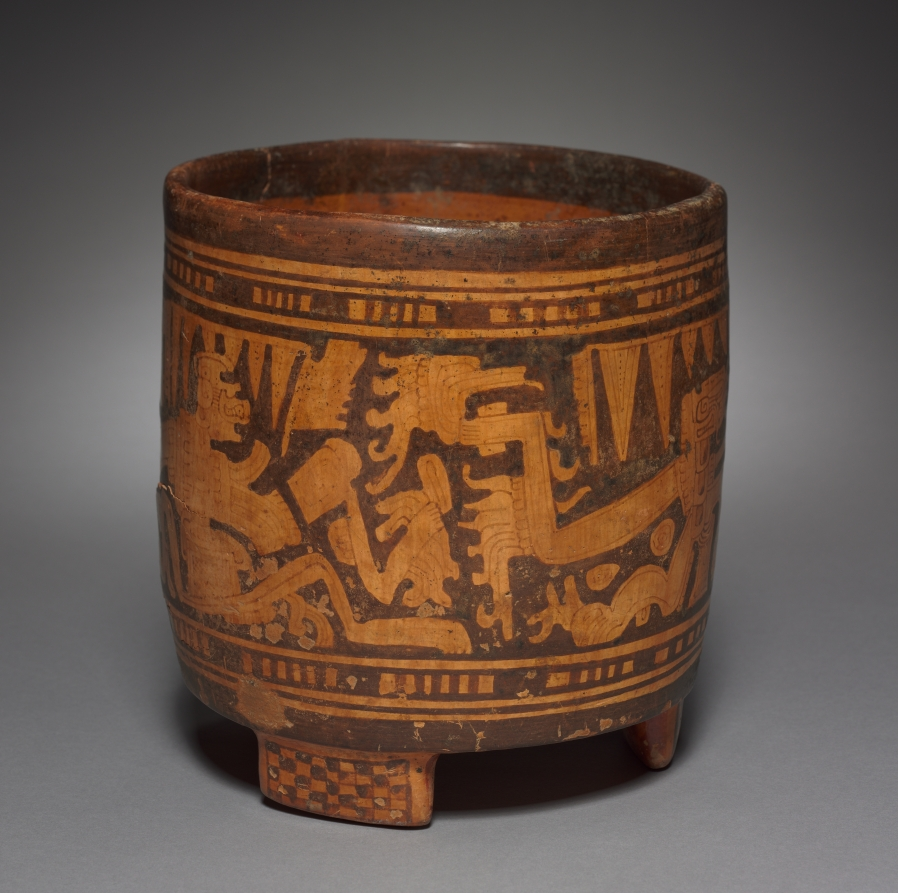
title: Vase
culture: Honduras, Maya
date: 250–900 CE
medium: earthenware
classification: Ceramic